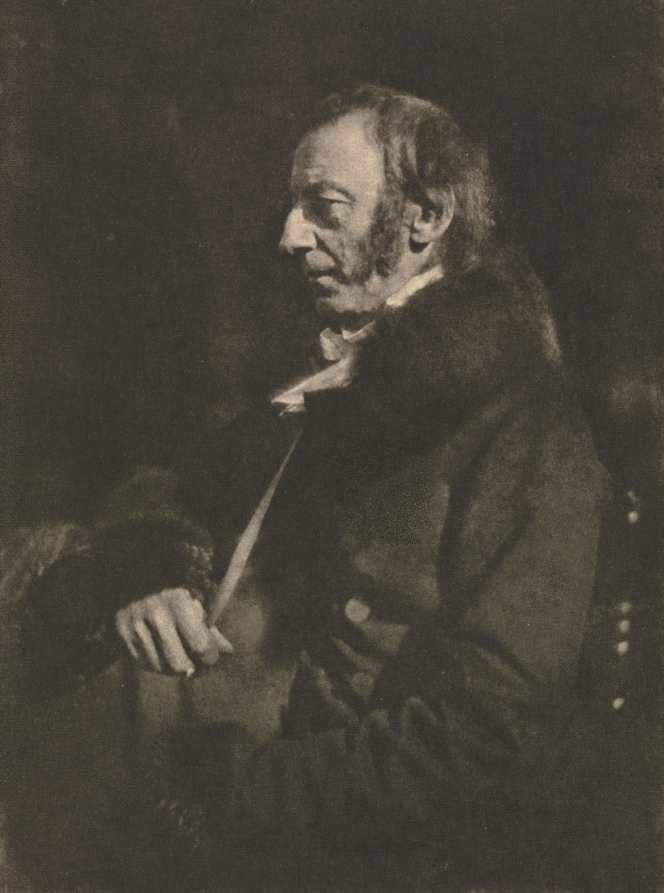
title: Camera Work: The Marquis of Northampton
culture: England, 20th century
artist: David Octavius Hill (British, 1802–1870)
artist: and Robert Adamson (British, 1821–1848)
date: 1912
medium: photogravure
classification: Bound Volume